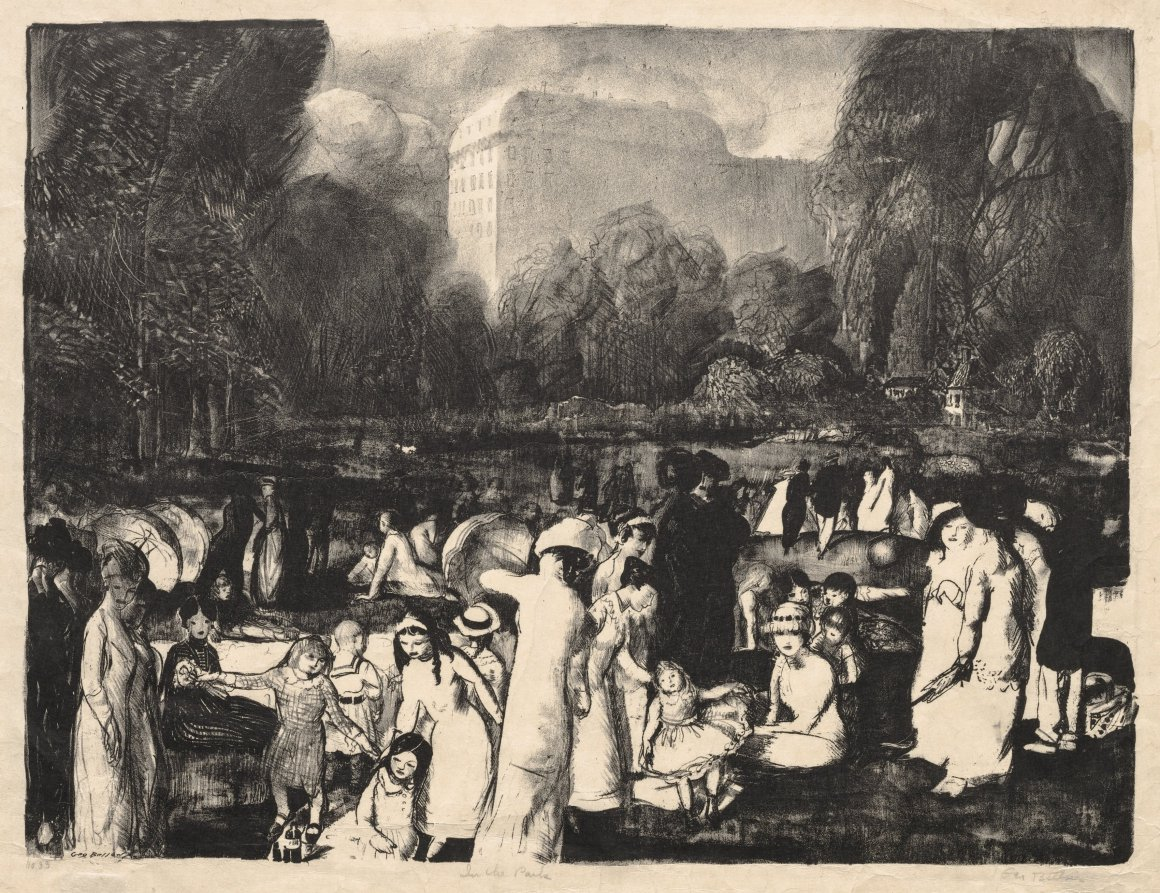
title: In the Park, Light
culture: America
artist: George Bellows (American, 1882–1925)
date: 1916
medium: lithograph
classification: Print